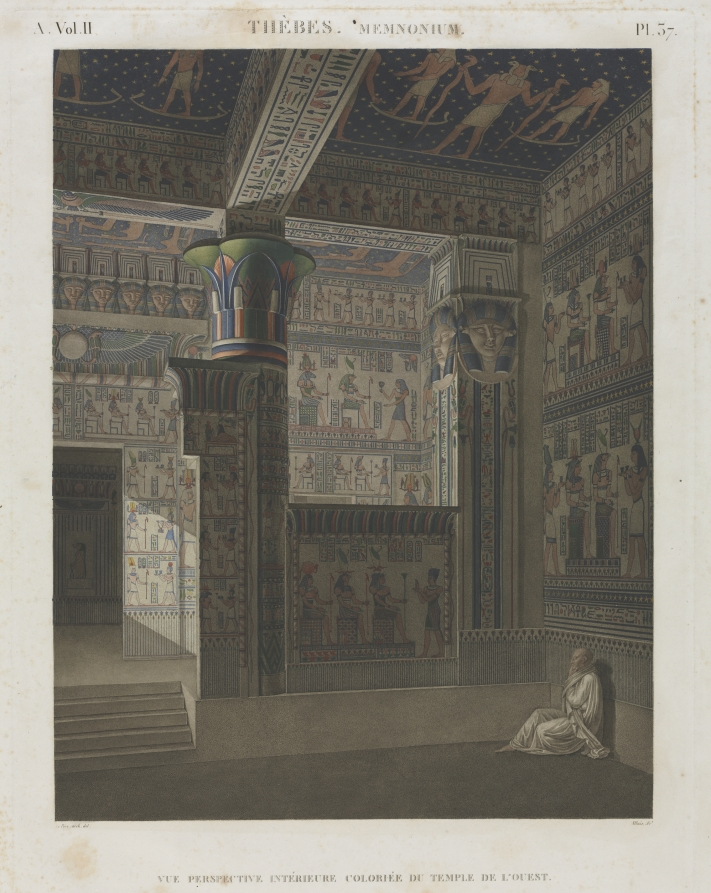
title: Description of Egypt: Thebes. Memnonium, Vol. II, Pl. 37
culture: France, 19th century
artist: Louis-Jean Allais (French, 1762–1833)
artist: after Le Père (French)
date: 1821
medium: etching, hand-colored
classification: Print